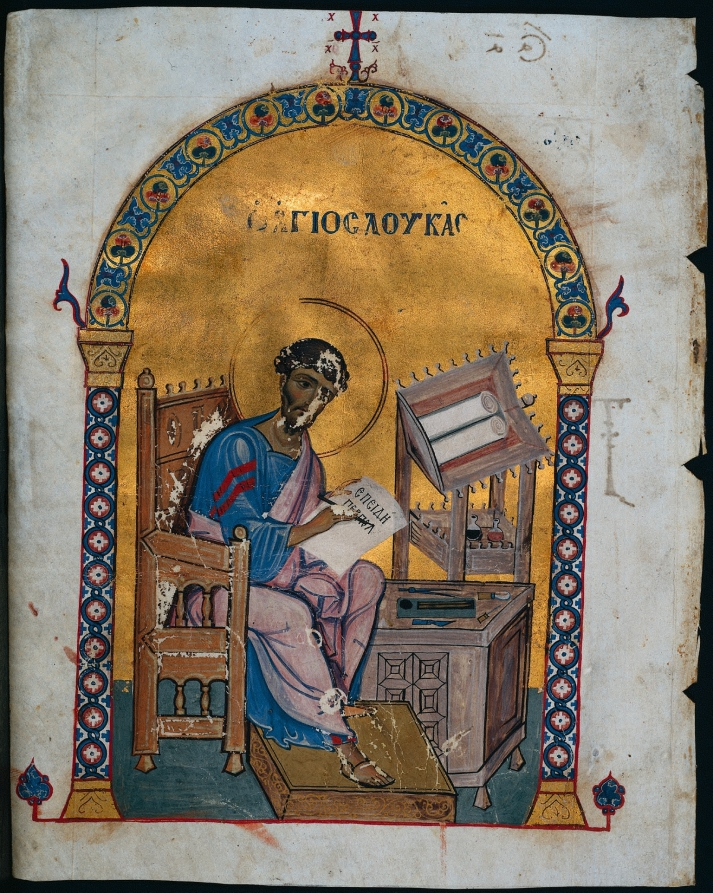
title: Leaf from a Lectionary with St. Luke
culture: Byzantium, Constantinople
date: 1057–1063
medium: ink, tempera and gold on vellum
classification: Manuscript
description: These leaves are from a lectionary (a book of gospel readings used in church services) that was presented to the Holy Trinity Monastery at Chalke in Constantinople by the Empress Katherine Komnene in 1063. The tools of the scribe’s trade are laid out before the evangelists: a stylus (a pointed tool for writing, drawing, and engraving), a pair of dividers (a device resembling a compass, used for dividing lines and transferring measurements), pens, a knife, a burnisher (polishing tool), and inkpots. Portraits of the authors of the Gospels—Matthew, Mark, Luke, and John—appear frequently in gospel books throughout the Christian world. Understood to be eyewitnesses to the texts they wrote, their presence in these books served to “authenticate” the gospels.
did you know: Commissioning a lectionary was a way for patrons to show their devotion to a particular church.